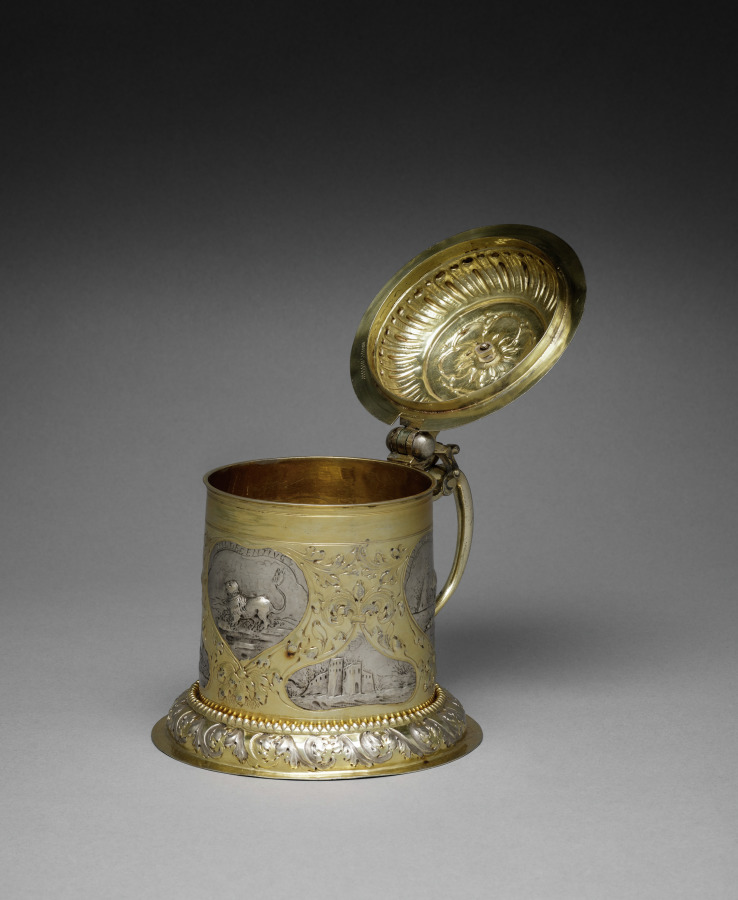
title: Tankard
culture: Germany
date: 1600s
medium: silver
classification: Silver